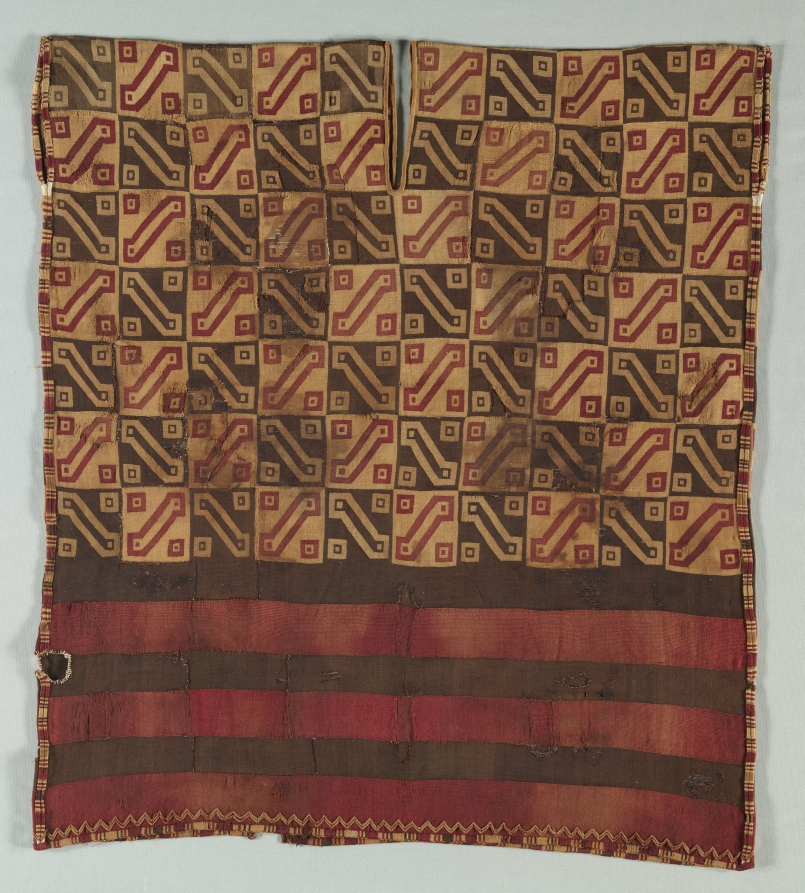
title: Tunic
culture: Peru, Inca, 15th-16th century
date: c. 1400–1540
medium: tapestry; cotton and camelid fiber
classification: Textile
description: Finely woven interlocked tapestry garments were a privilege of the nobility within the Inca Empire. Such garments were made throughout the vast Inca territory by women of noble families, by professional weavers, and by the Aclla (Chosen Women). These specialists lived in cloistered communities and served the state by brewing beer and weaving fine cloth. The products of their labor were redistributed by the Inca state as prized gifts to loyal vassals and allies. The standardized decorative scheme of this tunic, known as the Inca Key, is one of the most common Inca tunic patterns.